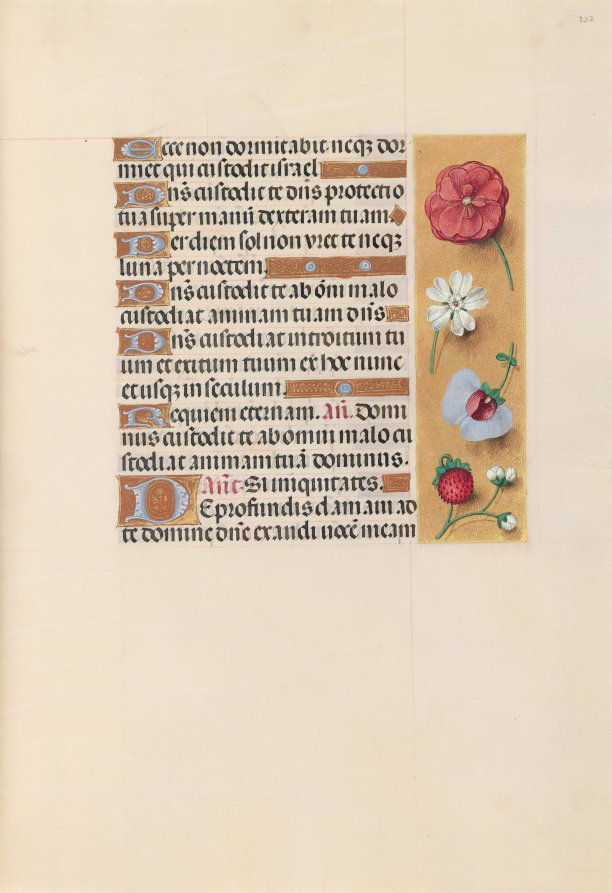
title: Hours of Queen Isabella the Catholic, Queen of Spain: Fol. 222r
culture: Flanders, Ghent and Bruges, late 15th century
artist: Master of the First Prayerbook of Maximillian (Flemish, c. 1444–1519)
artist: and Associates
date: c. 1500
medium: ink, tempera, and gold on vellum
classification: Bound Volume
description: This manuscript was illuminated by a circle of at least five highly organized manuscript painters active in the Flemish cities of Ghent and Bruges. The principal illuminator was Alexander Bening, who painted the majority of the book's miniatures. Manuscripts produced by this circle of artists are renowned for the decoration of their borders, which typically feature a rich variety of realistically-painted flowers, birds, and butterflies. This prayer book, called a book of hours, was intended not for a cleric, but for the private devotions of a lay person-in this case, Isabella the Catholic, Queen of Spain (1451-1504). Isabella's coat of arms embellishes the book's frontispiece. It is unlikely that the book was commissioned by the Queen herself; rather, she probably received it as a diplomatic gift from someone courting her patronage, perhaps Cardinal Francisco Jimenez de Cisneros. A Franciscan friar, Jimenez was dependent upon Isabella for his advancement, first to the post of Queen's confessor in 1492, and then to Archbishop of Toledo in 1495.